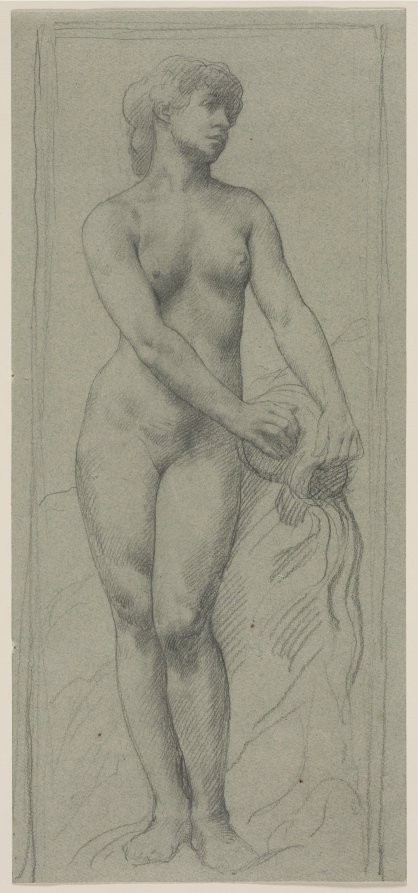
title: Nude Woman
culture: France, 19th century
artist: Alphonse Legros (French, 1837–1911)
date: c. 1853–1911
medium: pencil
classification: Drawing